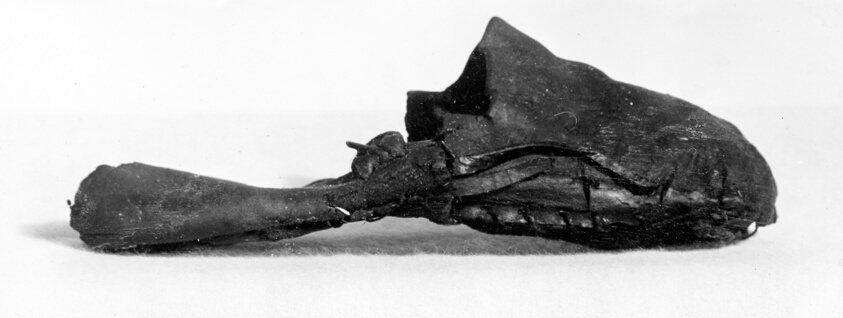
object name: Costume and Accessories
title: Child's Shoe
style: elizabethan, tudor, european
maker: England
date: 16th century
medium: Leather with buckle; part of heel and strap missing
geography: England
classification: textile; costume accessory - shoe; shoes - misc; costume; dress (garment); clothing